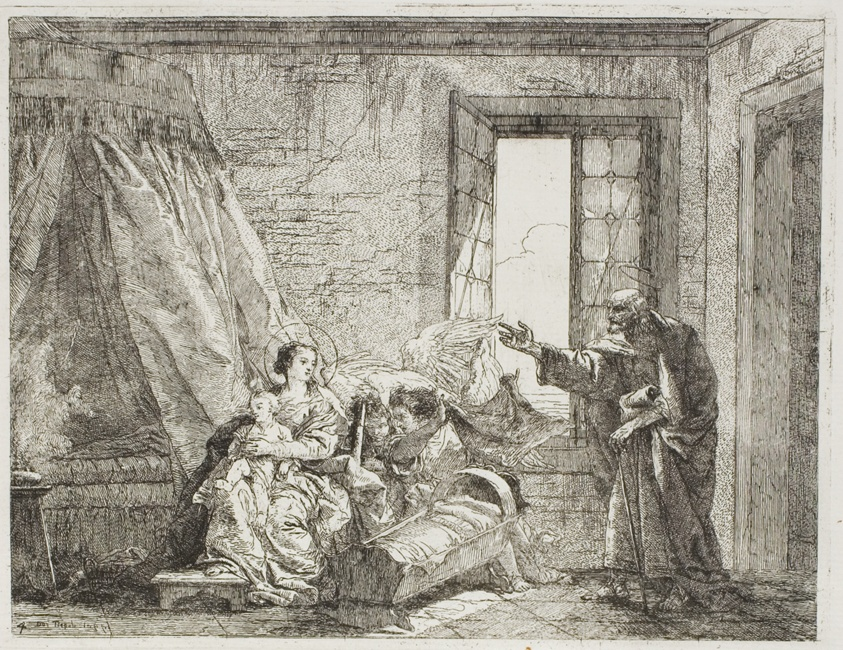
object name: Print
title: Joseph Tells Mary of Their Forthcoming Departure, plate four from The Flight into Egypt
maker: Giovanni Domenico Tiepolo (Italian, 1727-1804)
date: 1753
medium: Etching on paper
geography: Italy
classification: etching; print; prints and drawing